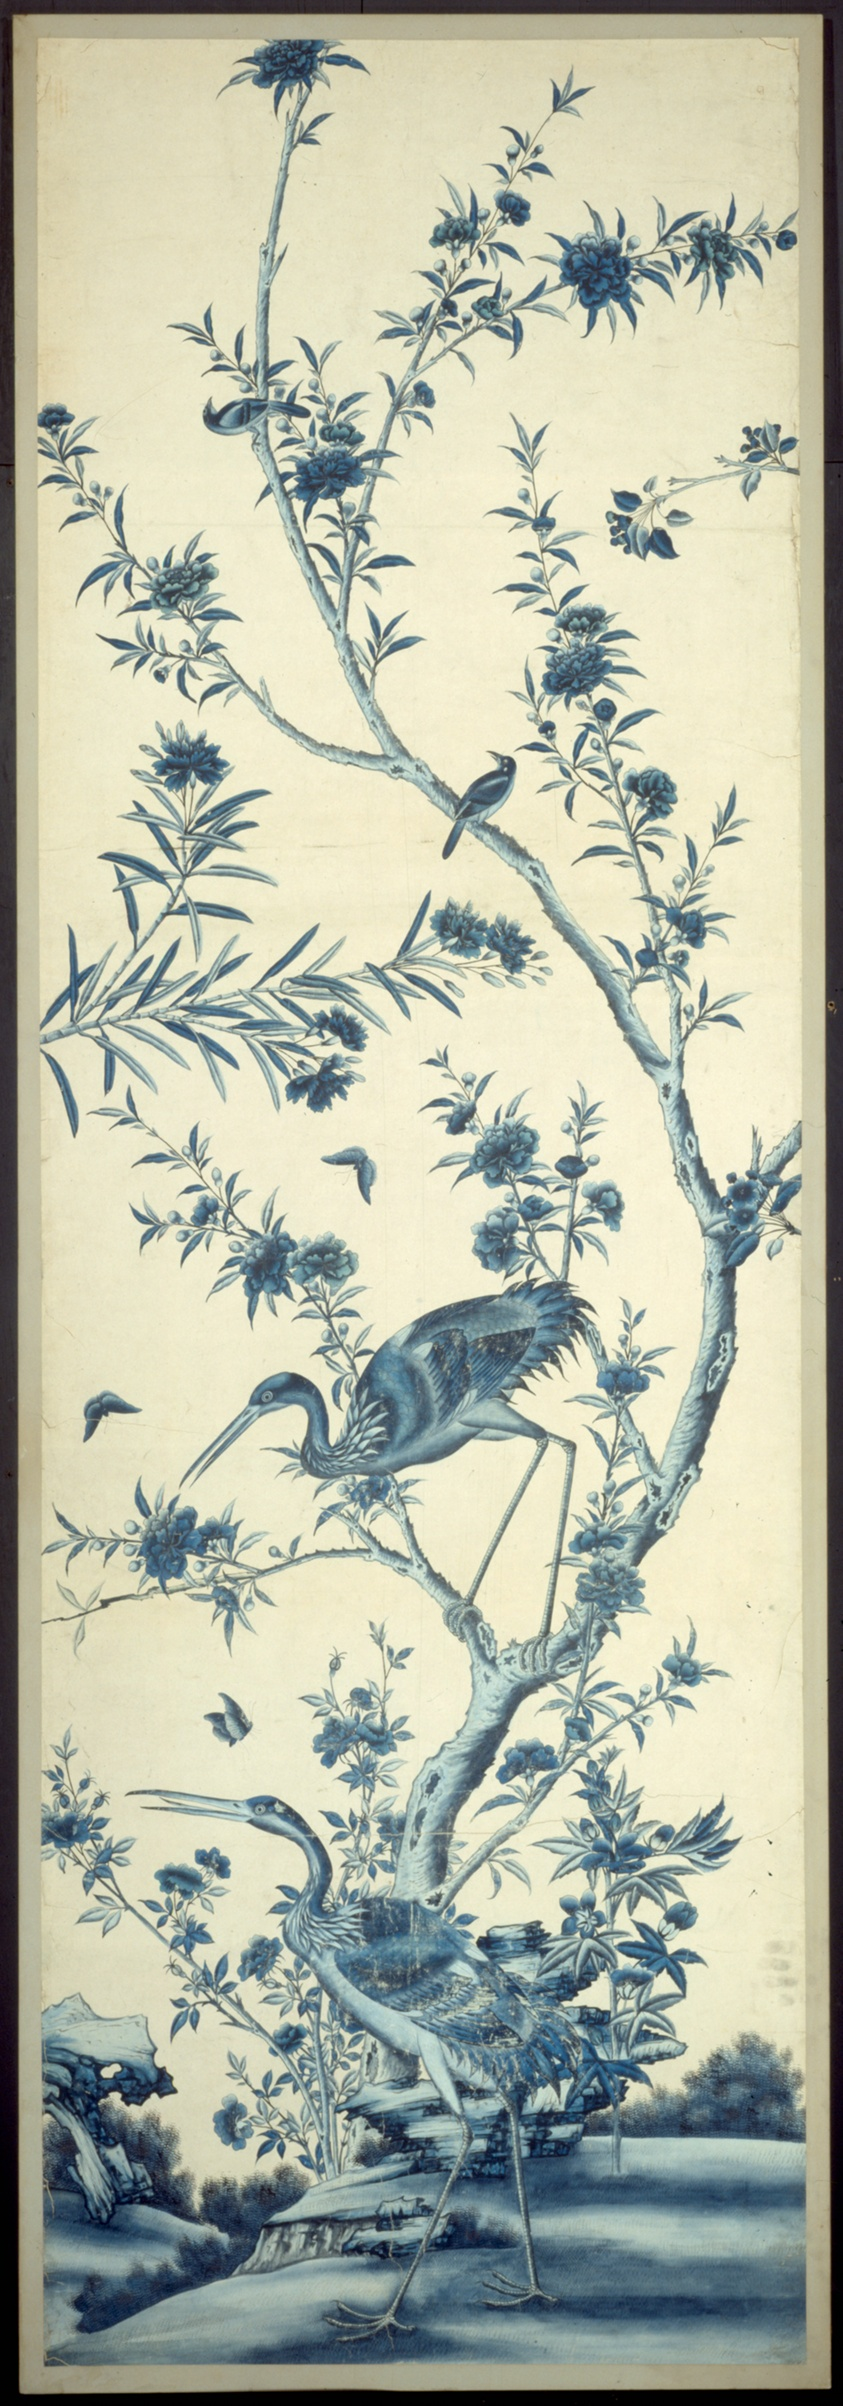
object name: Coverings and Hangings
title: Wallpaper Panel with Birds and Flowering Trees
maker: China, for the European market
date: Late 18th/early 19th century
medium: Hand-painted paper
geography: China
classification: wallpaper; paper; european decorative arts